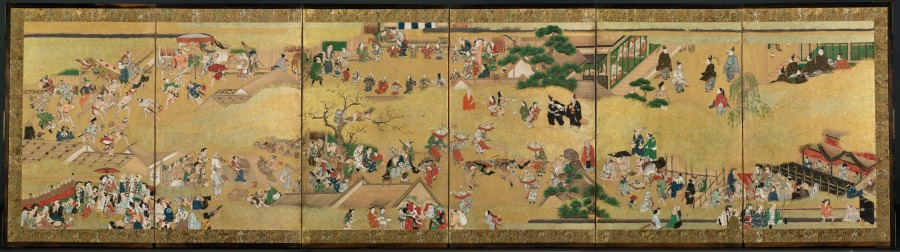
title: Festival Scenes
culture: Japan, Edo period (1615–1868)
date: 1600s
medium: One of a pair of six-panel folding screens; ink, color, gold, and gold leaf on paper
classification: Painting